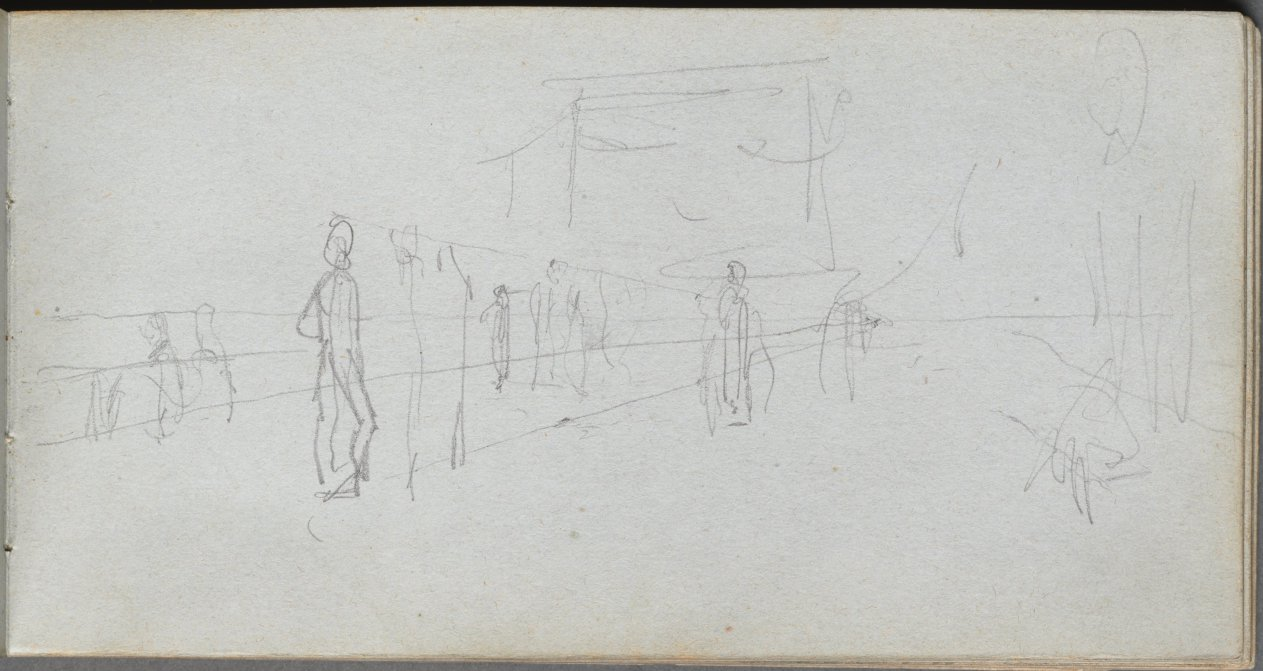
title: Sketchbook, page 40: Perspective Study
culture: France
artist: Ernest Meissonier (French, 1815–1891)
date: c. 1860s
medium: graphite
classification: Bound Volume